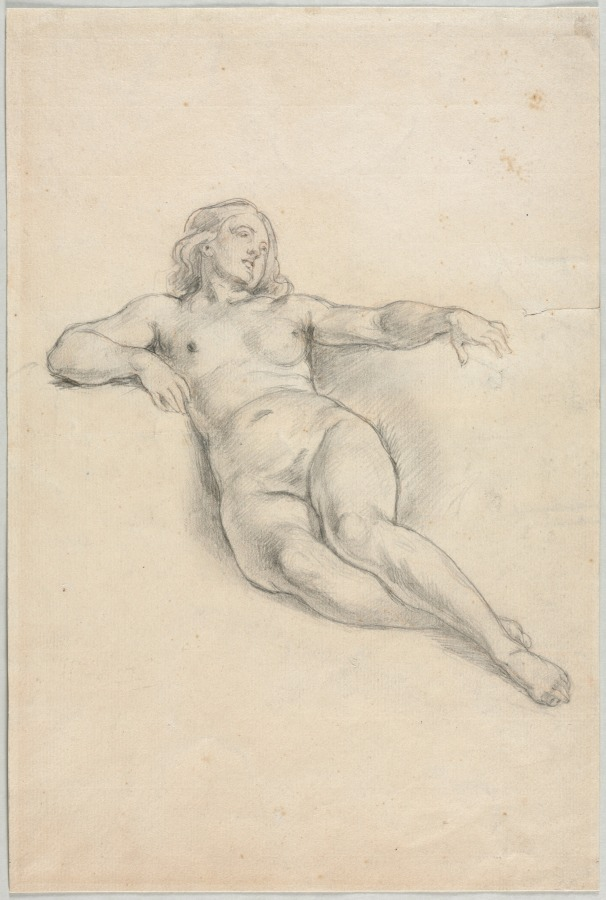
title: Reclining Female Nude (recto); Various Sketches of Figures and Plants (verso)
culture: France, 19th century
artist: Anonymous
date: 19th century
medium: graphite, with stylus and traces of red gouache(?)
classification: Drawing